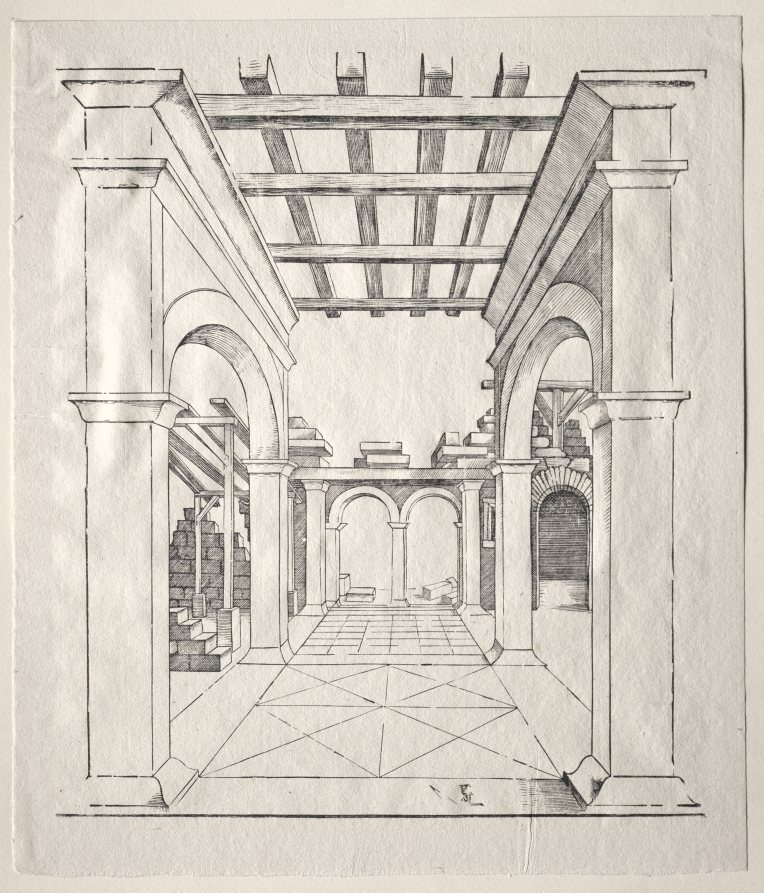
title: A Portico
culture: Germany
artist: Erhard Schön (German, c. 1491–1542)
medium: woodcut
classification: Print